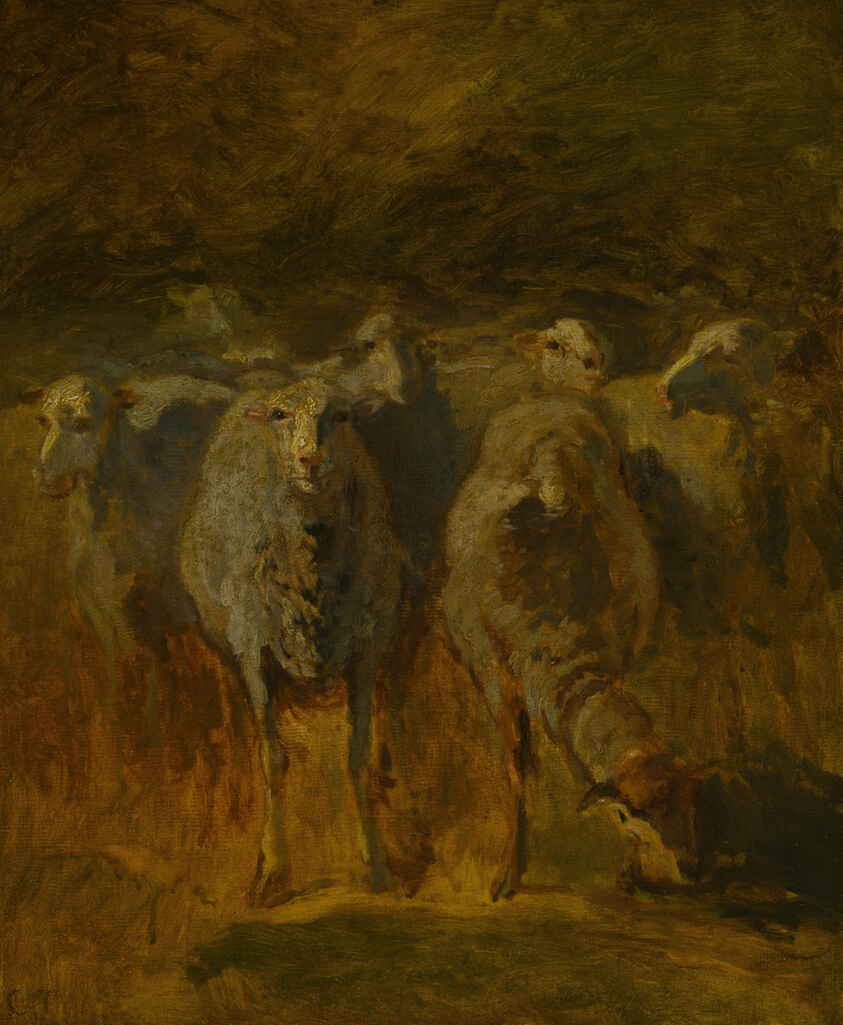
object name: Painting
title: Unfinished Study of Sheep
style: nineteenth century, 19th century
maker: Constant Troyon (French, 1810–1865)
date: c. 1850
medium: Oil on canvas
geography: France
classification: painting; paint; oil paintings (visual works); oil on canvas; french; european painting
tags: sheep, study, sketch, animals